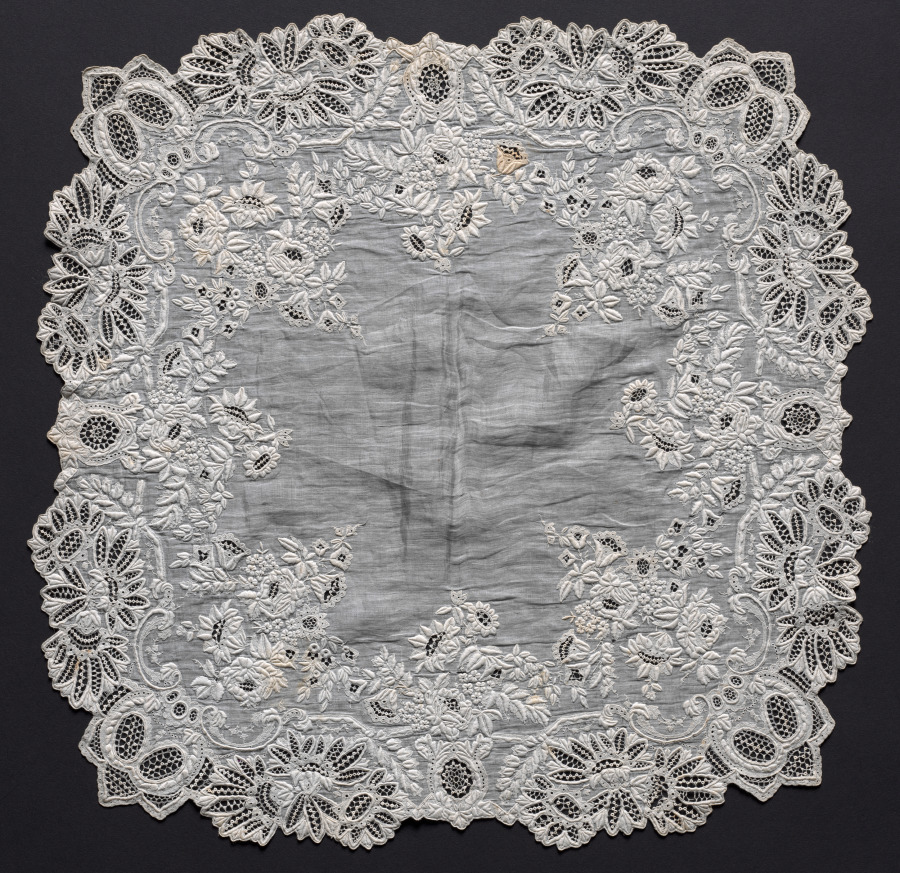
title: Embroidered Handkerchief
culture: Switzerland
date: 1800s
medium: Plain weave linen: cotton embroidery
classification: Embroidery